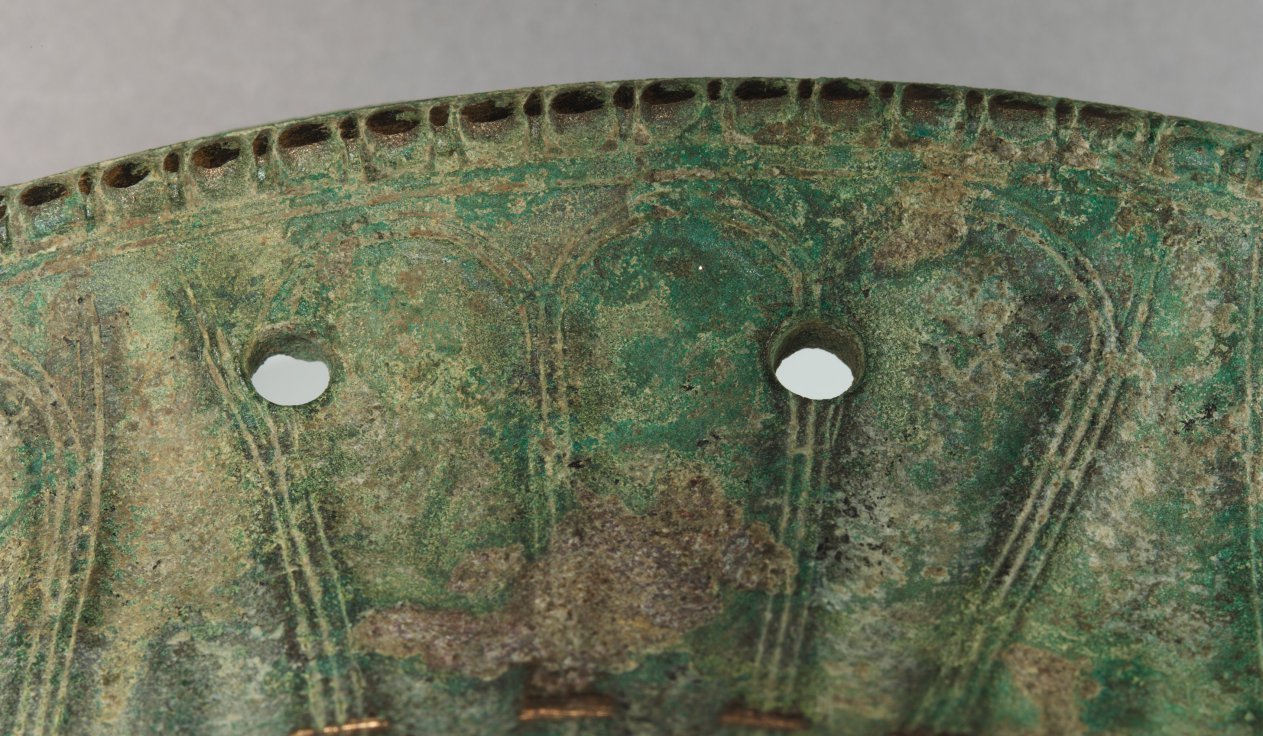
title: Bronze Volute Krater Base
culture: Greece, Laconia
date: late 600s BCE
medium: bronze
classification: Metalwork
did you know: This object supported a large vessel used for mixing wine with water called a krater.